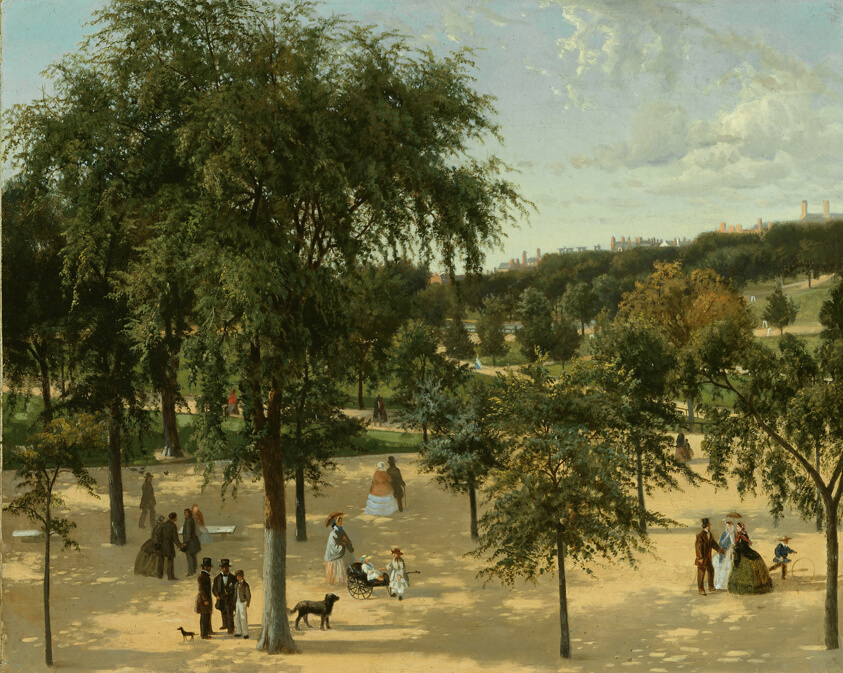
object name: Painting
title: Boston Common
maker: Artist unknown (American, 19th century)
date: 1850–63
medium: Oil on canvas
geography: United States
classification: painting; american arts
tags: cityscapes, landscapes